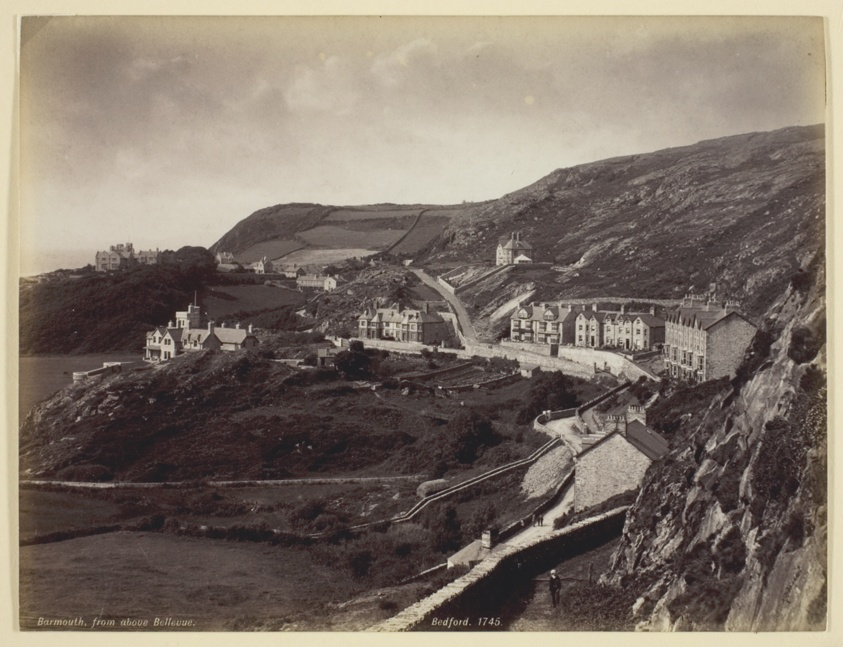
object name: Photograph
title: Barmouth, from above Bellevue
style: 19th century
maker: Francis Bedford (English, 1816–1894)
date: 1860/94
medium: Albumen print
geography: England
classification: albumen silver print; photographic process; photography; photograph